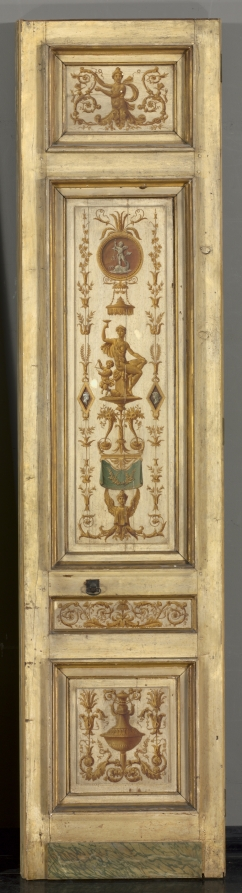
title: Double-leaf Doors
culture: France, 18th century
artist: Pierre Rousseau (French, 1751–1829)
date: 1790s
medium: oil on wood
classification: Painting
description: Shifts in style and taste often result in changes to original architectural details. Rousseau painted these doors with imitation dark wood grain. Another craftsman later scraped off the dark color surrounding the classical designs. This set was conserved in 1979 and retains more traces of the original graining than the other doors by this artist in the museum's collection.